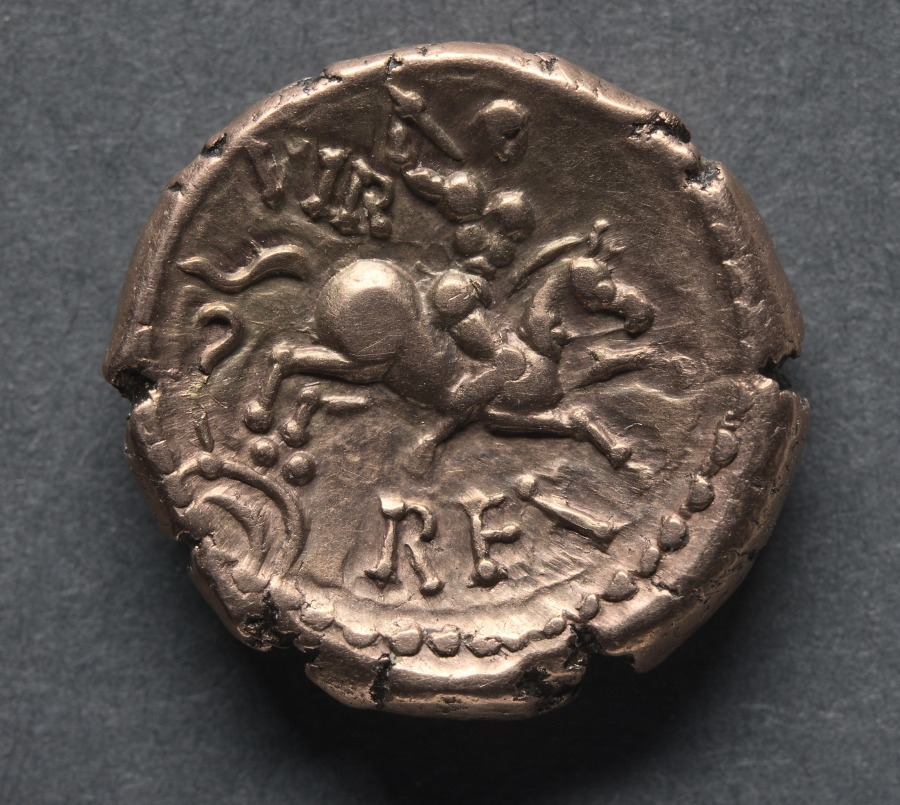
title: Verica Stater: Sunken Tablet (obverse); Horse and Rider (reverse)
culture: England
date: c. 10–40 CE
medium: gold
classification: Coins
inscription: "COM F"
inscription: VIR REX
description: Verica was the youngest son of Commius. He is identified as the Bericus whom the historian Sion Cassius refers to as being in exile, and appealing to Claudius for help. Commius was king of the Atrebates. When Caesar was planning his first visit to Britain, some Britons sent him envoys with offers of hostages and allegiance to Rome. Caesar received them favorably and retained no hostages but sent Commius and his high commissioner with instructions to persuade the Britons to ally themselves with Rome, and to expect Caesar in person in a few weeks time. This took place in 55 BC. It is therefore possible that Verica was either born fairly late in his father's life or that he was illegitimate. However that may be, his reign can with reasonable accuracy be placed as being in the first and second quarters of the first century AD.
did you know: Verica was king just before the conquest of Britain by the Romans.